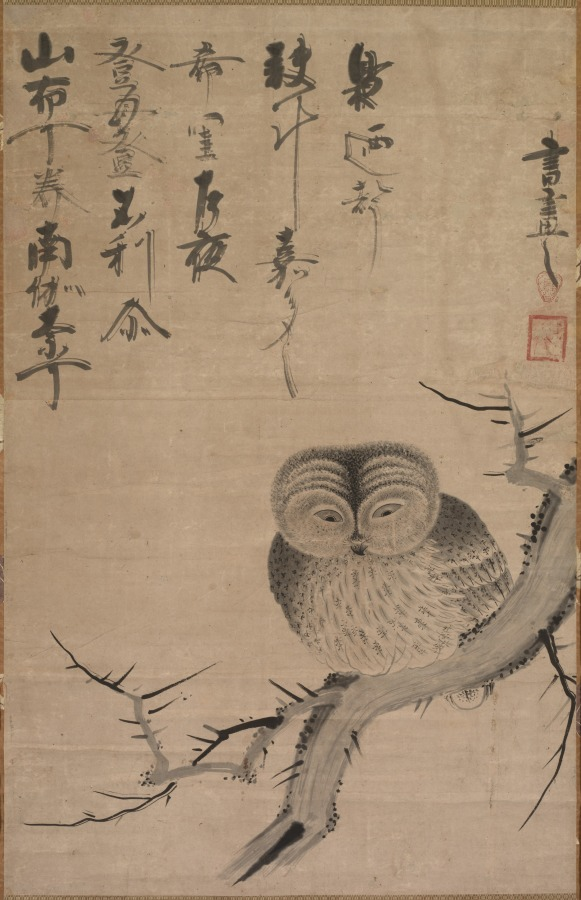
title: Owl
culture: Japan, Edo period (1615–1868)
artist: Tsuda Bensaku (Japanese, active 1620s–40s)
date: 1630s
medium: hanging scroll; ink and slight color on paper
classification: Painting